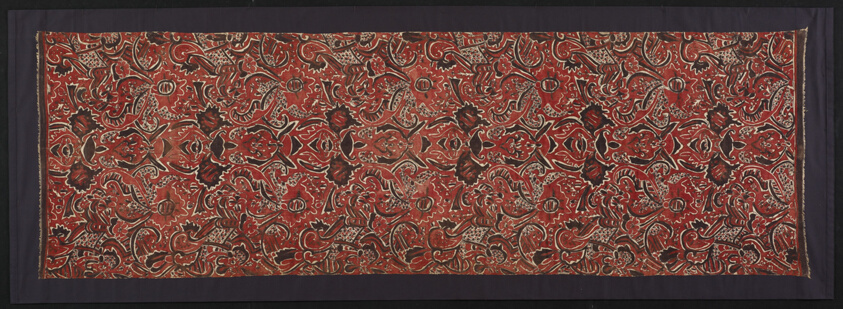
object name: Religious/Ritual Object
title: Ceremonial Hanging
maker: India, Gujarat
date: late 17th/early 18th century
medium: Cotton, plain weave; mordant dyed; hand-painted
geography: India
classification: textile; weaving - printed; ritual objects